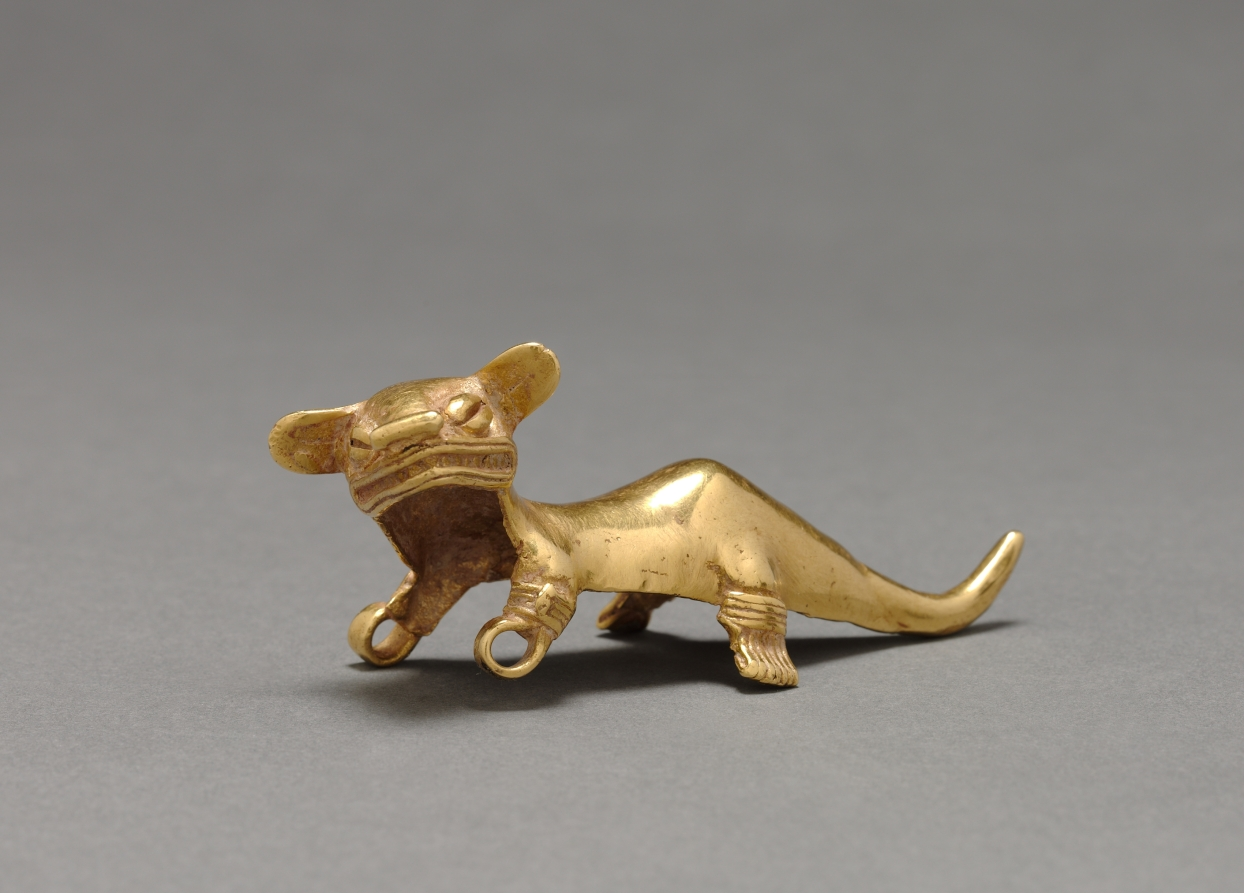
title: Feline Pendant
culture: Western Panama, Veraguas-Gran Chiriquí Style, 10th-16th century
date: c. 1000–1550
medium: cast gold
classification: Metalwork